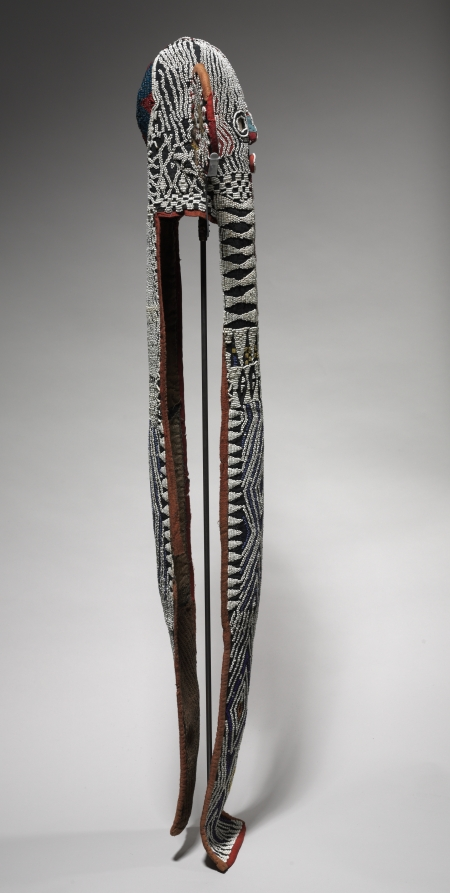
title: Mask (mbap mteng): Elephant (aka)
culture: Africa, Central Africa, Cameroon, Grassfields region, Bamileke-style maker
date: early 1900s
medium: Cotton, burlap, glass beads, twine, leather, and wood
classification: Mask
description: The name given to masks like this, mbap mteng, means "animal with huge ears." In the Cameroon Grassfields kingdoms, the elephant signifies power, authority, prestige, and leadership. The colorful glass beads that decorate the mask’s surface were imported from Venice and Bohemia (in Europe) and signal wealth and prosperity. Its geometric patterns include triangles that evoke the leopard, another animal linked with royal power. Members of Kuosi, an elite male society, wore such elephant masks for ritual dances and funerary ceremonies. This mask would have been worn with a costume that included a feather headdress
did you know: Performers wore elephant masks with indigo-dyed robes, red feather headdresses, and leopard pelts. Leopards and elephants symbolized royal power.